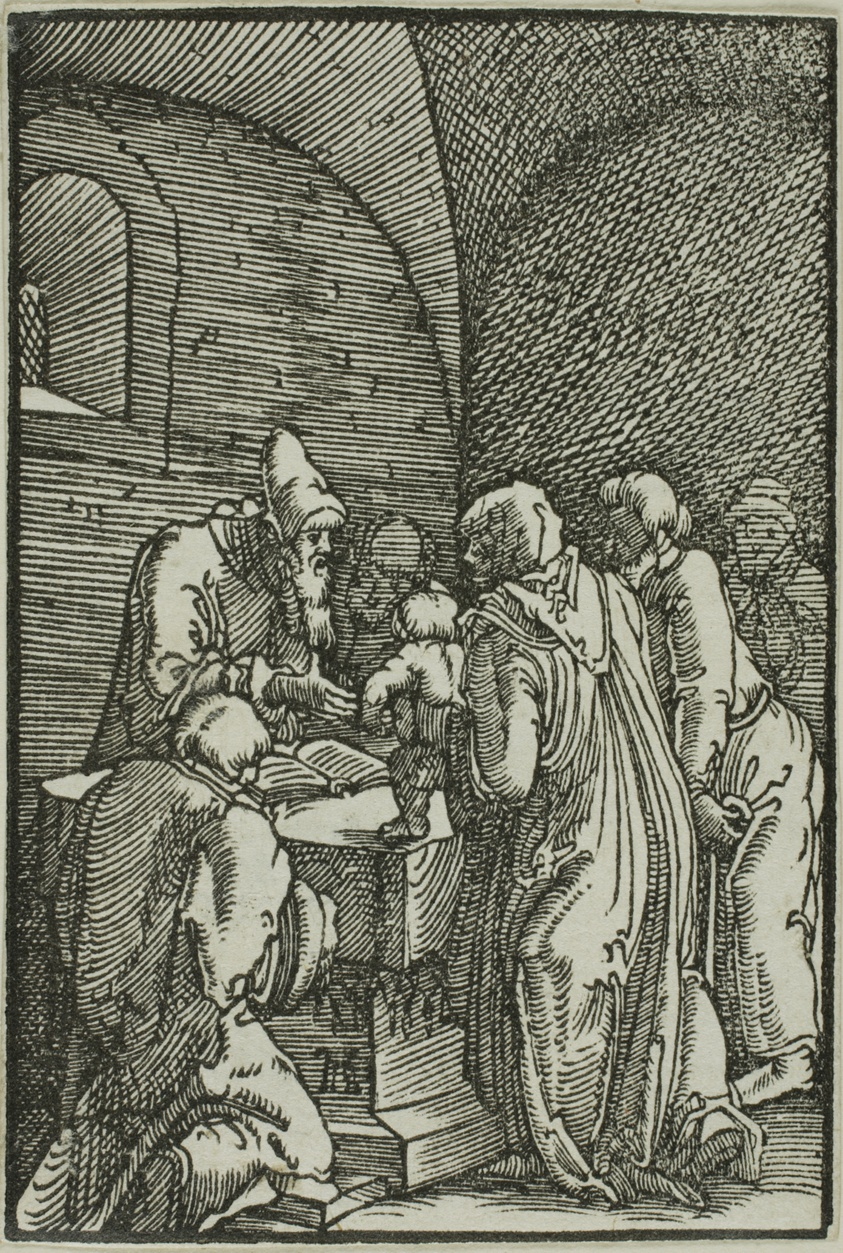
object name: Print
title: The Presentation in the Temple, from The Fall and Redemption of Man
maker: Albrecht Altdorfer (German, c.1480-1538)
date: 1513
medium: Woodcut in black on ivory laid paper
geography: Germany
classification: wood engraving; print; prints and drawing